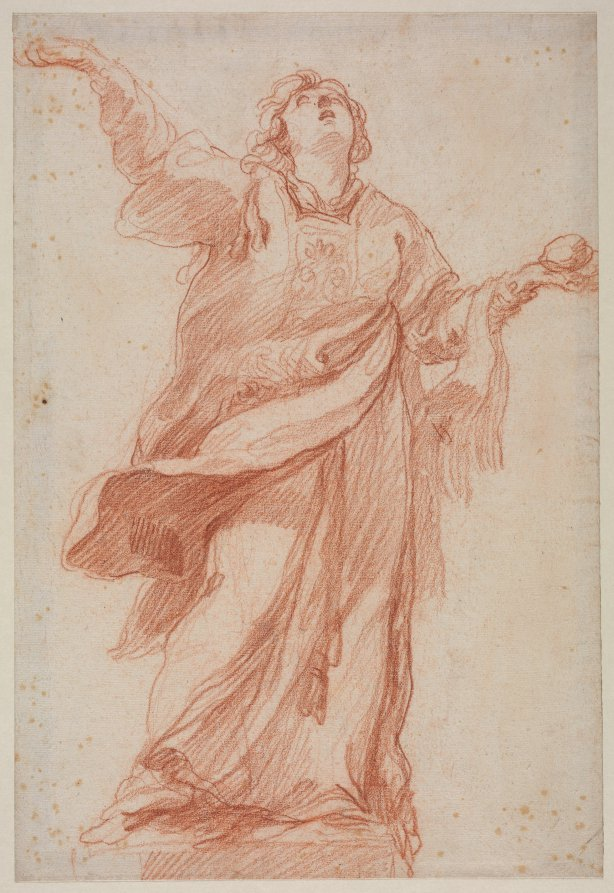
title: Saint Stephen in Ecstasy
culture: France, 18th century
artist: Edmé Bouchardon (French, 1698–1762)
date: second third 1700s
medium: red chalk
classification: Drawing